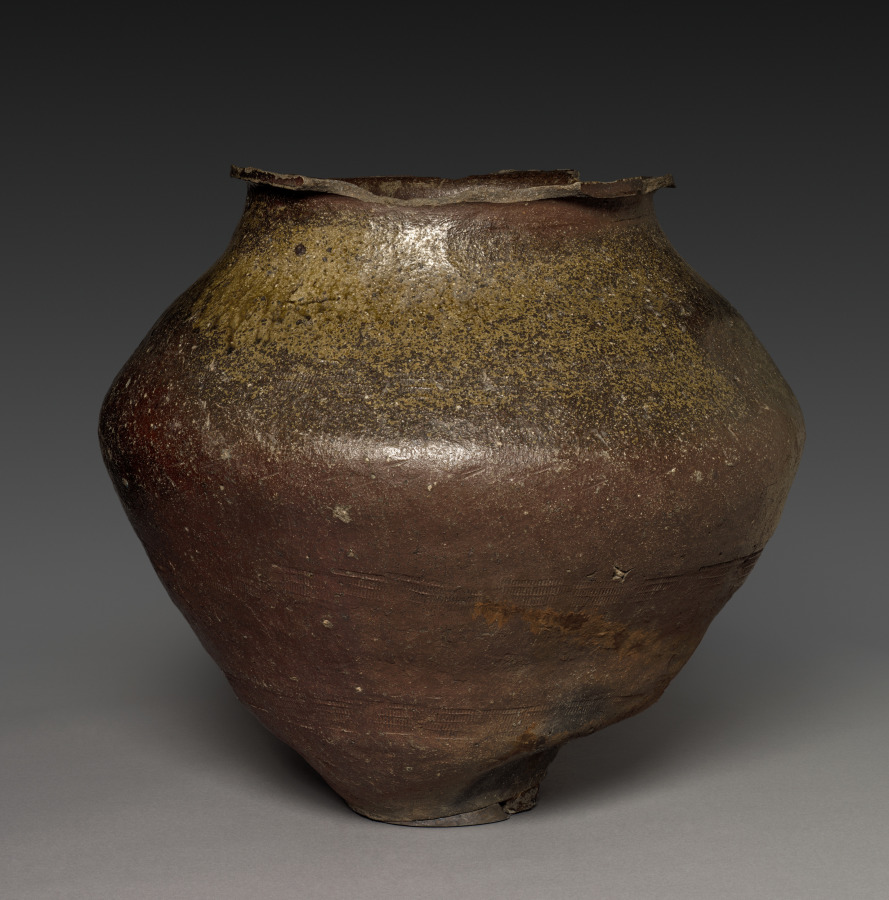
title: Storage Jar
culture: Japan, Nanbokuchō period (1336–92)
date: 1350–99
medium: Stoneware with natural ash glaze and impressed designs (Tokoname ware)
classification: Ceramic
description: This storage jar was made by piling coils of clay atop one another, smoothing the inner and outer surfaces, and allowing the clay to dry before adding another section of the form. The wide rim and mouth were then added using a potter’s wheel. Because of its small base, the vessel could stand safely on a narrow step on the steep slope of a rising kiln floor. Such kilns were built into the side of a hill and used wood for firing. The natural ash glazes took about a week to 10 days to form.